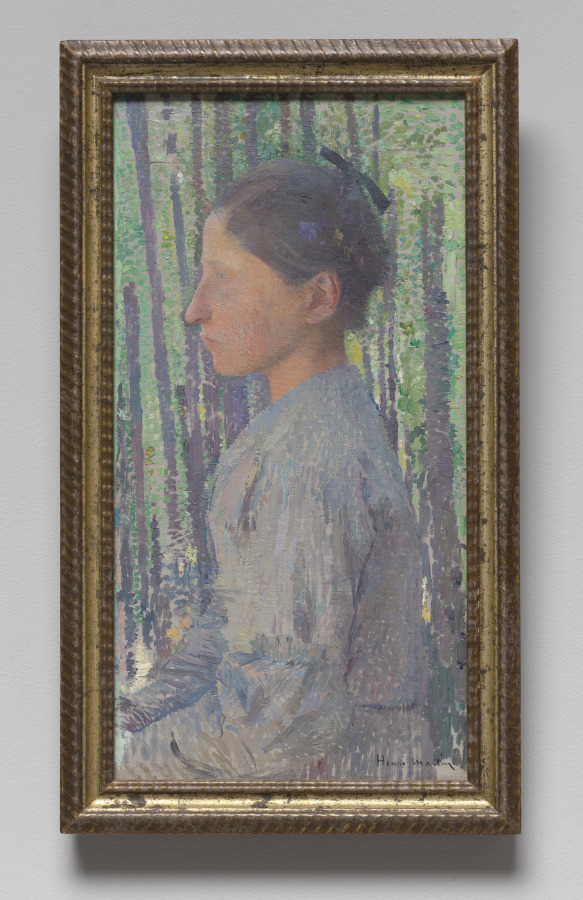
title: Woman in Profile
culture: France, 19th - 20th century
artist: Henri Jean Guillaume Martin (French, 1860–1943)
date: c. 1889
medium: oil on canvas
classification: Painting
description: Henri Martin was an important French painter from Toulouse known for his contributions to the Neo-Impressionist movement. He painted this striking depiction of a woman seated outdoors before tall trees at a moment when he was just beginning to develop his mature style. The figure and background are painted with short, thickly applied strokes of pure color, filling the composition with energy and life. The trees are rendered with small hatching strokes and form a background of nearly abstract, decorative shapes.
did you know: A highly celebrated artist during his lifetime, Henri Martin received commissions to produce large paintings to decorate the interiors of important buildings in Paris, including the Palais Royal, the Hôtel de Ville (city hall), the Sorbonne, the Palais de Justice, and Élysees Palace.